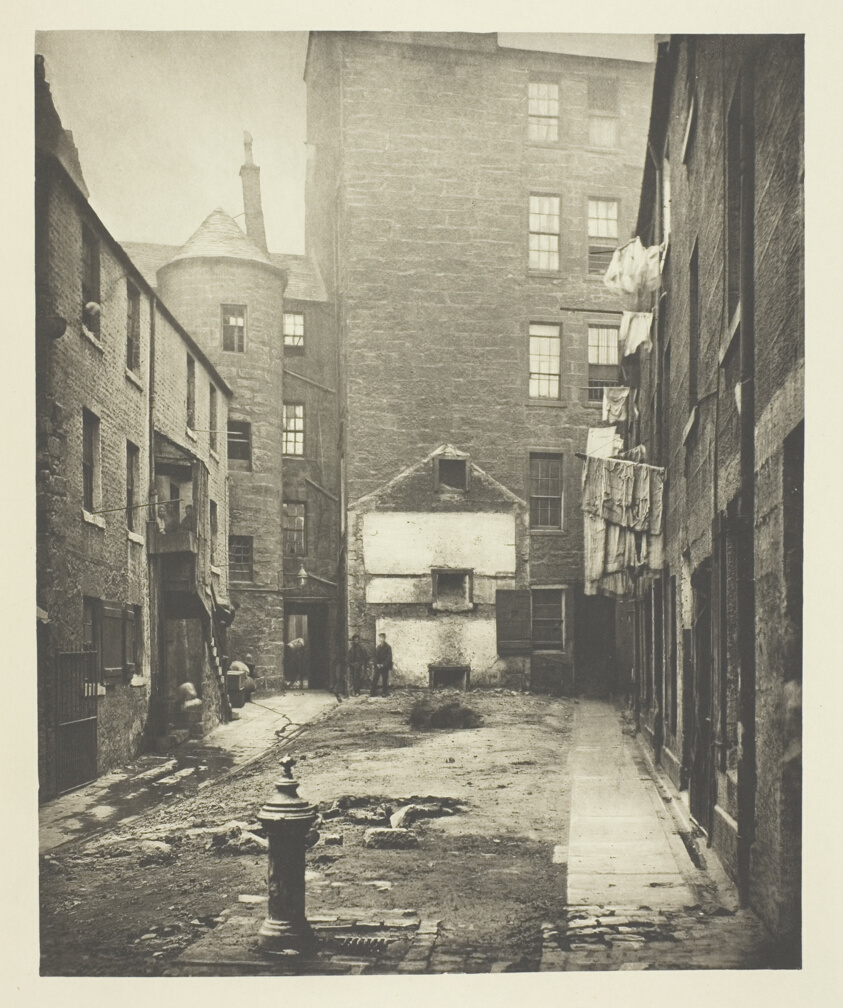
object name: Photograph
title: Closes 97 and 103 Saltmarket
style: 19th century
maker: Thomas Annan (Scottish, 1829–1887)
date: 1868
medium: Photogravure, plate 28 from the book "The Old Closes & Streets of Glasgow" (1900)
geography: Scotland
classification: photograph; photography